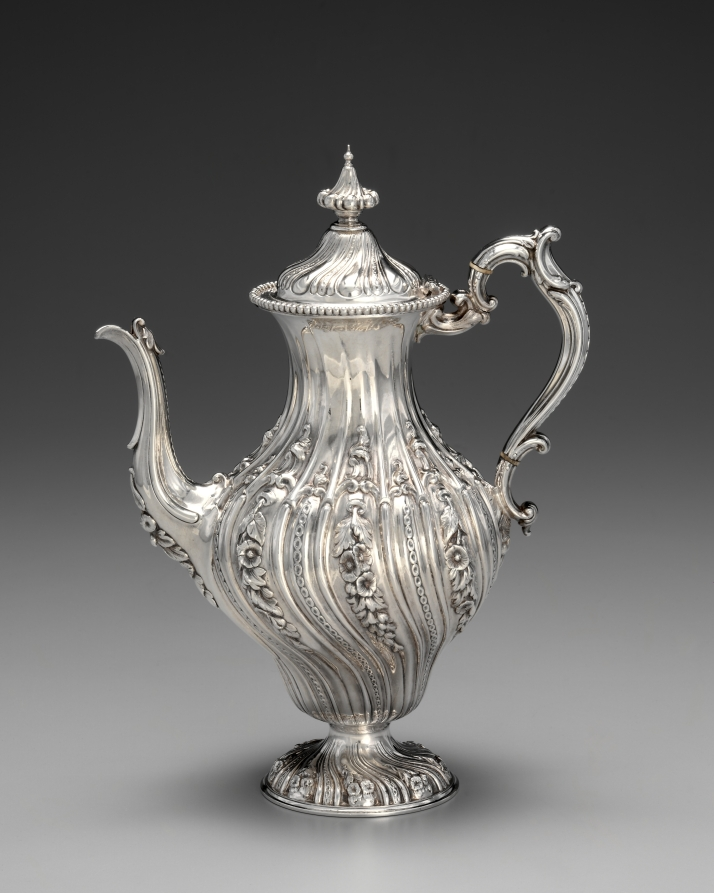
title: Neo-Rococo Coffee Pot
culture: England, 19th century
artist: Elkington & Co. (British)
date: c. 1850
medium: silver and ivory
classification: Silver